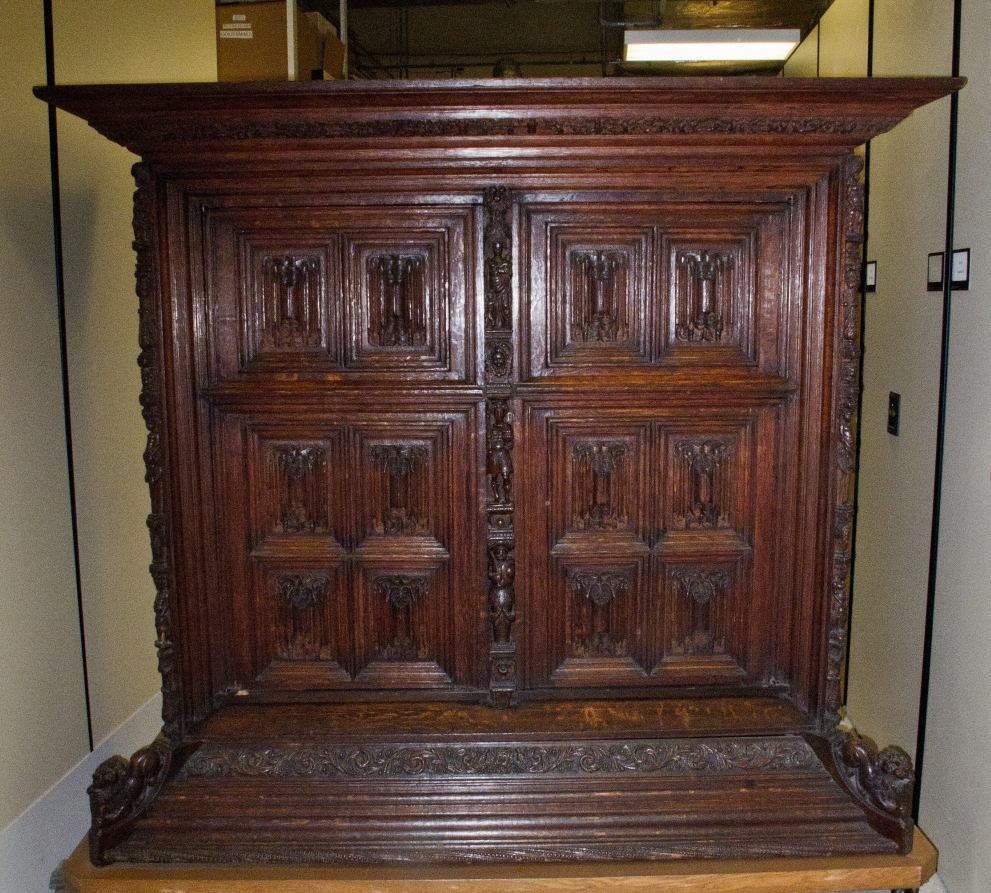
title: Wardrobe (Kast)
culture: Netherlands, 16th century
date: c. 1580–1600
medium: oak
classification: Furniture and woodwork